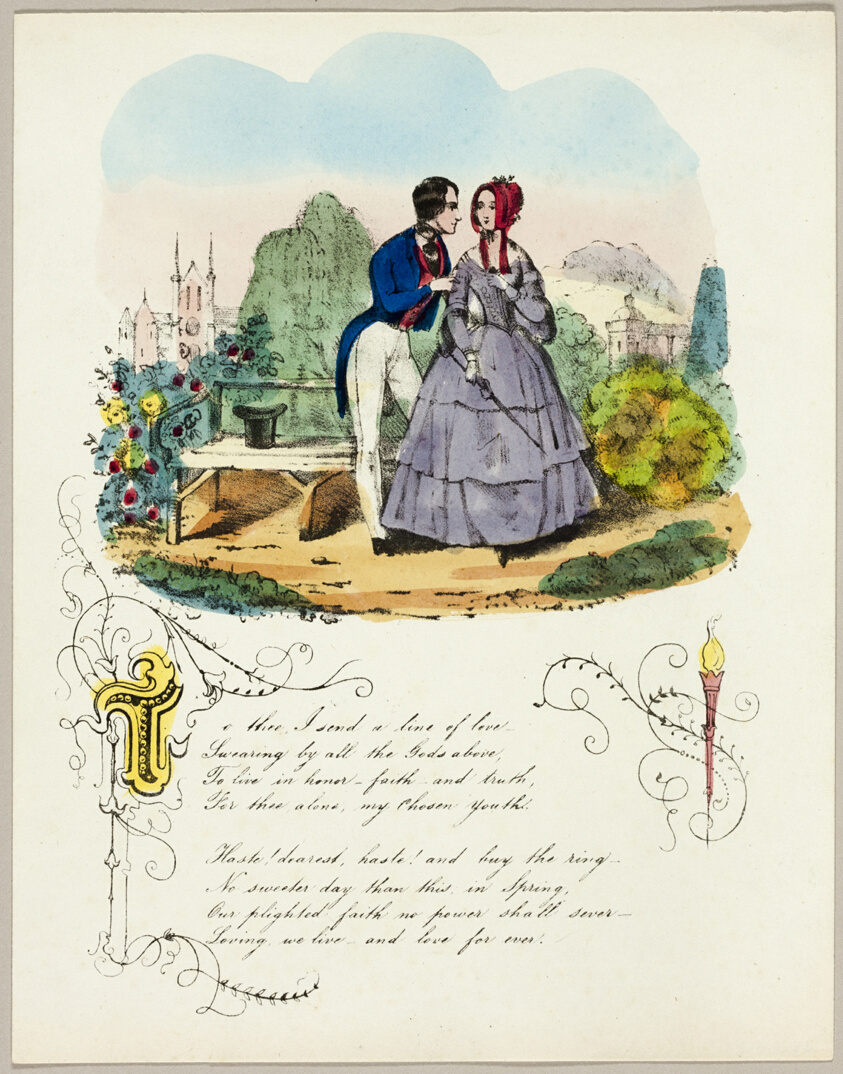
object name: Print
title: To Thee, I Send a Line of Love (valentine)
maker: Unknown Artist; English, 19th century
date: c. 1842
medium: Lithograph with hand-coloring on ivory wove paper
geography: England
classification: valentine; prints and drawing; print